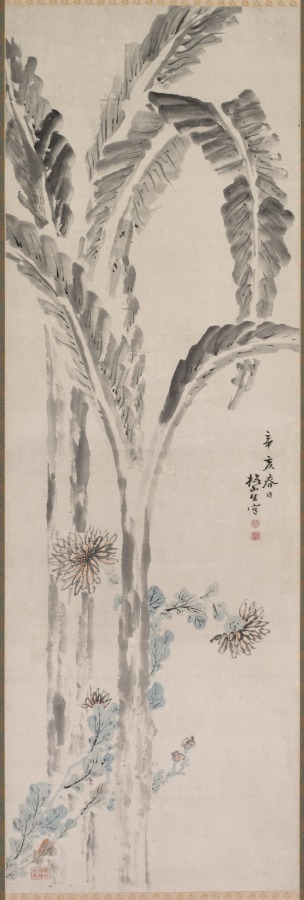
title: Banana Plant and Chrysanthemum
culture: Japan, Edo period (1615–1868)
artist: Tsubaki Chinzan (Japanese, 1801–1854)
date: c. 1820–54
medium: hanging scroll; ink and color on paper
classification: Painting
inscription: artist's inscription and two seals middle right side.